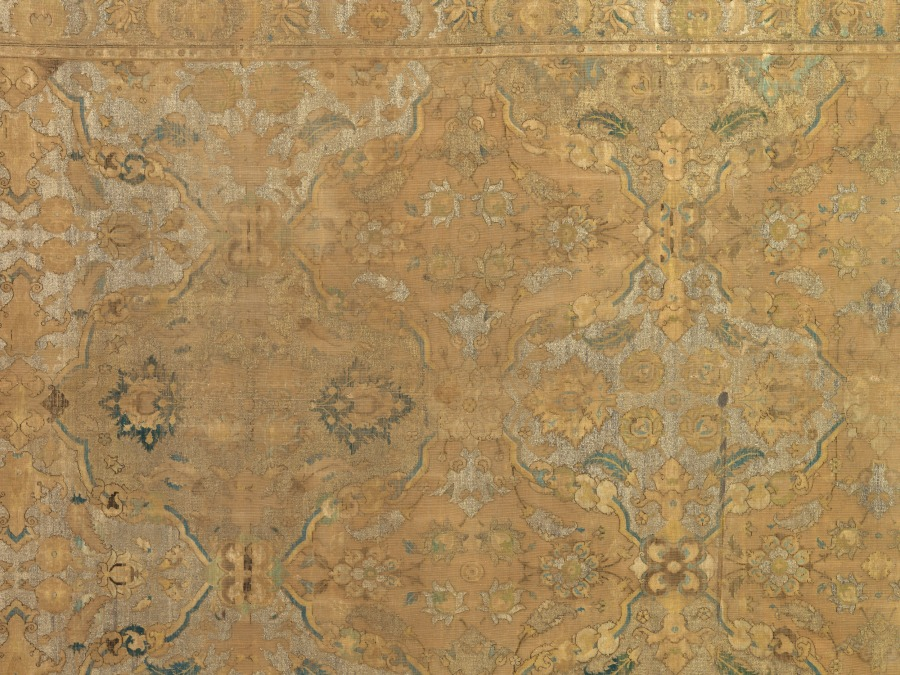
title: Carpet, so-called "Polonaise"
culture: Iran, 17th century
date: 17th century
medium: senna knot: silk, silver and gold filé brocading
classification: Carpet